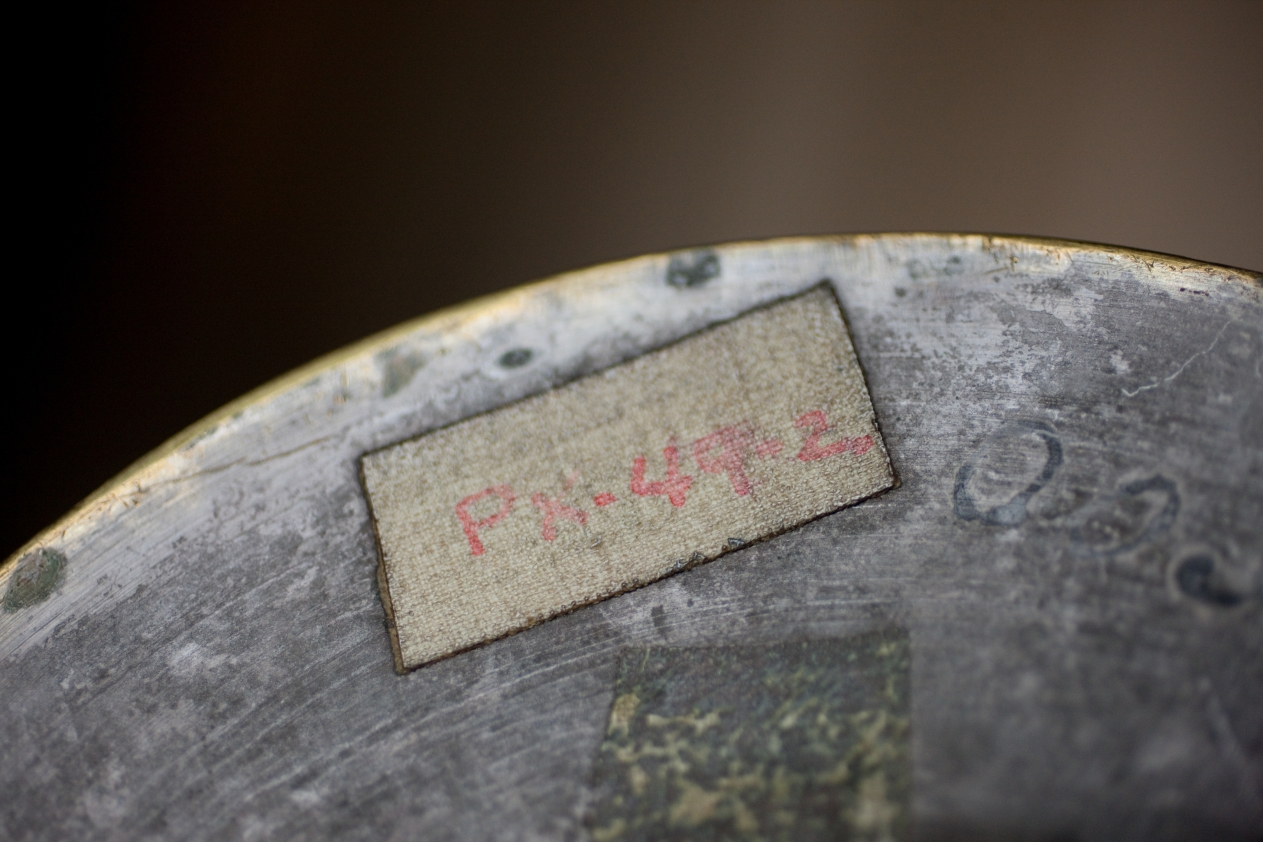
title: Luxury Ewer Extending Good Fortune to the Owner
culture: Iraq, possibly Mosul, Zangid or Artugid Period, 13th Century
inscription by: Ahmad al-Dhaki al-Mawsili (Iraqi, Mosul, active early 1200s?)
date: 1223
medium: brass inlaid with silver; lid and base added later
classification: Metalwork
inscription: Band on the neck (naskh): "Work of Ahmad al-Thaki, the engraver, al-Mawsili, in the year 620 and glory to my owner"; band at the base of the handle (naskh): "Work of Ahmad al-Thaki al-Mawsili"; graffiti of later owners, roughly scratched into the neck of the ewer: "Husayn ibn Qasim"; "Usta al-Muhtasib [?]"; band on the shoulder of the ewer (plaited, animated kufic): "Good luck, and learning, and commanding respect, and prosperity, and pride, and generosity, and faithfulness, and affection, and glory, and survival, and justice, and blessings, and exaltedness, and prosperity, and everlasting peace, and charitable giving."; band on the foot (naskh) [foot is a later addition]; this inscription has not yet been deciphered.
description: This silver inlaid ewer was produced for luxury clientele. The wide band around the body of the vessel displays vignettes of daily and courtly life contained within multilobed medallions. Some of the scenes feature falconry, hunting, dancing, and several groups of musicians. All these scenes are set off against a skillfully executed arabesque background—a pervasive motif in Islamic art characterized by interwoven vegetal and curvilinear elements. An inscription around the ewer’s shoulder extends good fortune, prosperity, and peace to the owner. The ewer is dated 1223 and signed by the master craftsman Ahmad al-Dhaki of Mosul.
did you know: Later owners roughly scratched their names into the neck of the ewer.